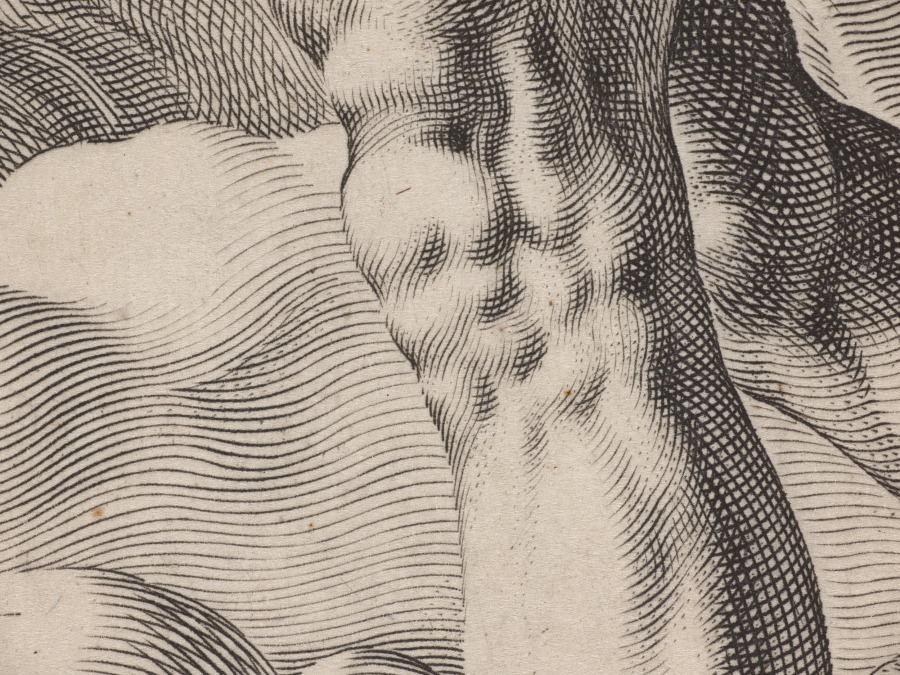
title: Apollo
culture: Netherlands, 16th century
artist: Hendrick Goltzius (Dutch, 1558–1617)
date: 1588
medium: engraving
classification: Print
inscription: upper center, in plate (words form a halo around Apollo's head): Sol rutilus radiante coma, et fulgore corusco / Dispellit tenebras, totumque illuminat orbem ; lower center, in plate: HG.[in monogram] fe. ; lower center, in plate: A°.88. ; VERSO, upper center, in graphite: 38 N°60 ; upper center, in graphite: H. Goltzius ; lower center, in graphite: C3575 7. ; lower center, in graphite: 1-10 ; lower right, in graphite: H 131 ; lower right, in graphite: 12[circled] ; lower left, in graphite: 1C [lt?]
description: This engraving depicts Apollo as the radiant sun god. With fire-like hair, he strides through rolling waves of clouds, while in the background his chariot makes its daily trip across the sky. The Latin text that forms his halo translates: “With its aureole and shining ray, the bright Sun drives away the darkness and lights the whole earth.” Apollo’s excessively muscled body reflects an aspect of Mannerism, a stylistic trend in the mid- to late 1500s that exaggerated natural qualities. By over embellishing Apollo’s musculature, Goltzius transformed an athletic male body into a supernatural one.